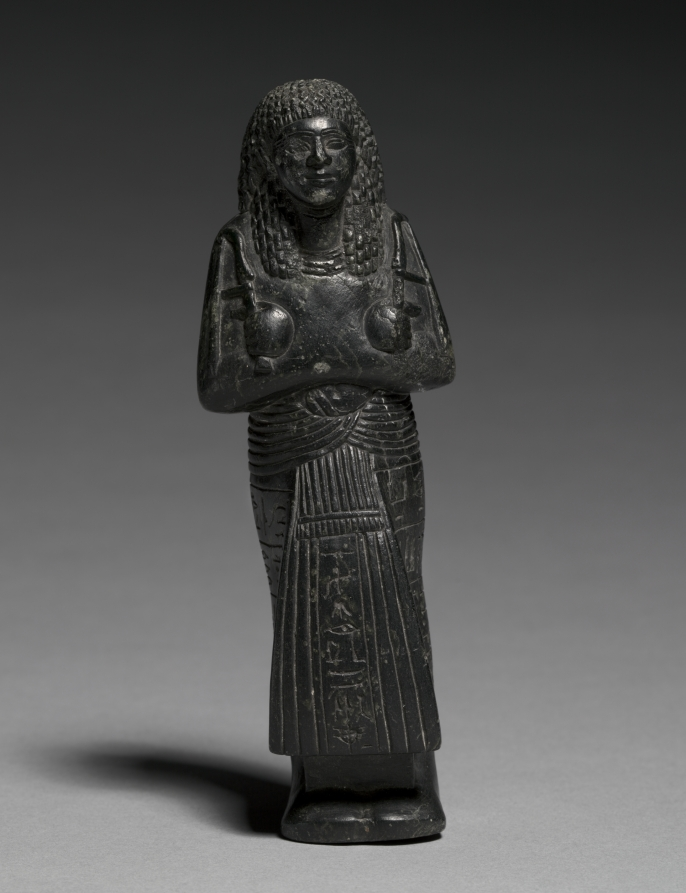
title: Shawabty of Nebmehyt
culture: Egypt, New Kingdom (1540–1069 BCE), Dynasty 19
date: c. 1295–1240 BCE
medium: steatite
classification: Funerary Equipment